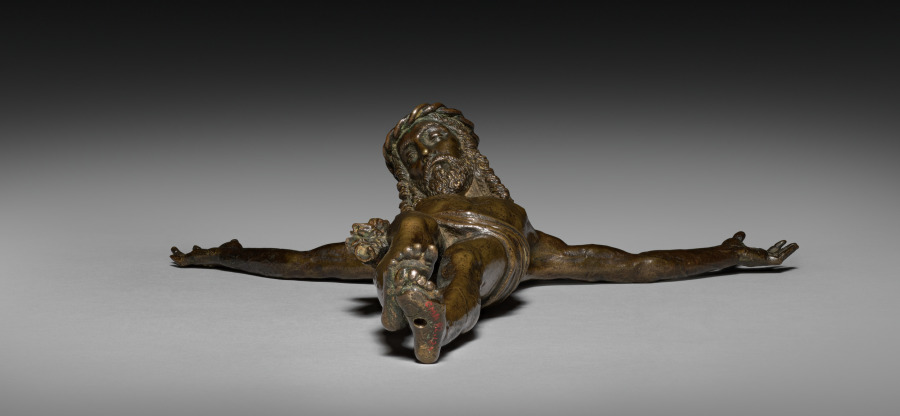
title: Crucified Christ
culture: Italy, Ravenna, 16th century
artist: Severo da Ravenna (Italian, c.1496–c.1543)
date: c. 1500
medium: bronze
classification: Sculpture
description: The highly finished surface of this sculpture, including the back, suggests it belonged to a refined collector. Small sculptures would often be held to admire details such as the strands of hair streaming onto Christ’s shoulders, the prominent veins in his forearms, and the intricate knotted cloth at his side.